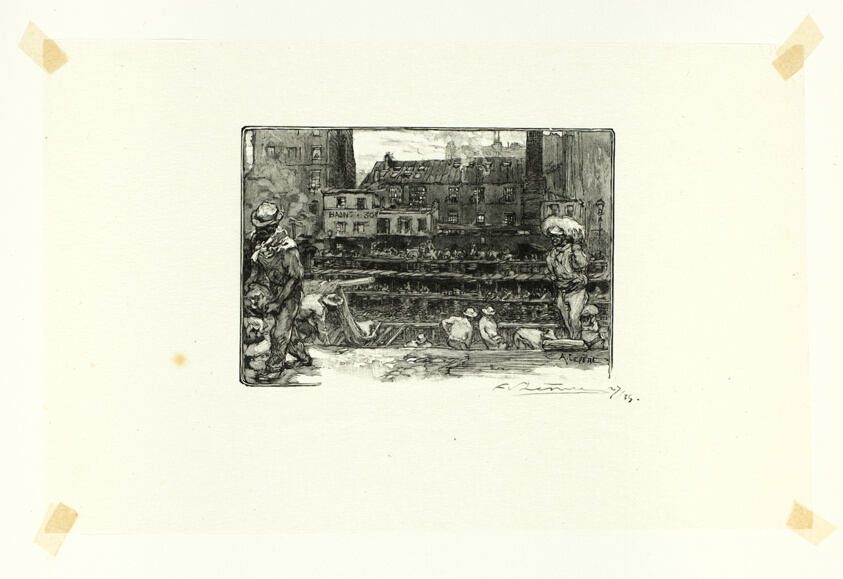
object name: Print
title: Plaster Unloaders, plate three from Le Long de la Seine et des Boulevards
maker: Louis Auguste Lepère (French, 1849-1918); published by A. Desmoulins (French, active c. 1908-1910)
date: 1890, published 1910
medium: Wood engraving in black on cream Japanese tissue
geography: France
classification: wood engraving; paper; print; prints and drawing